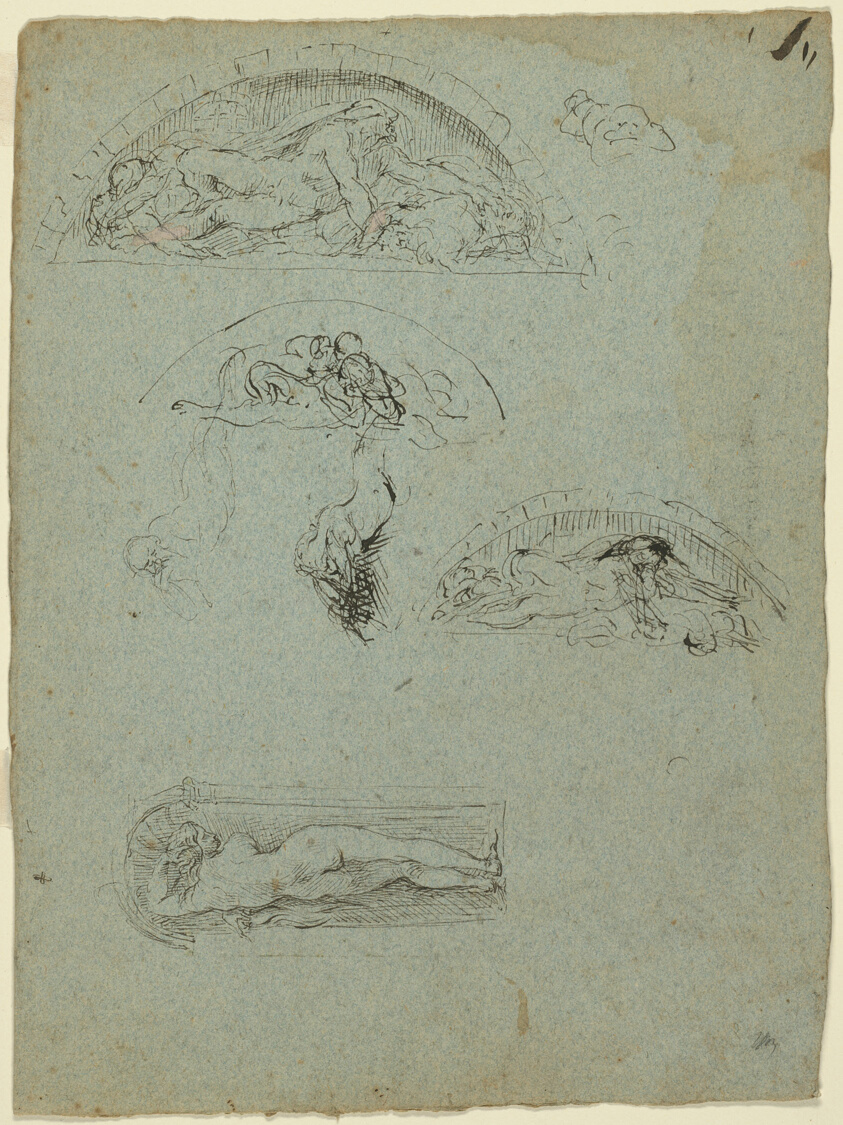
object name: Drawing and Watercolor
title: Standing Figure in a Niche and Studies for the Ugolino Group (recto); Red-Robed Prelate in a Crowd (verso)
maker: Jean Baptiste Carpeaux (French, 1827-1875)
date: 1857/58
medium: Pen and black ink, with touches of pink gouache (recto), and pen and black ink with brush and gray wash and red and white gouache (verso), on blue wove paper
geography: France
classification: pen and ink drawings; drawings (visual works); prints and drawing